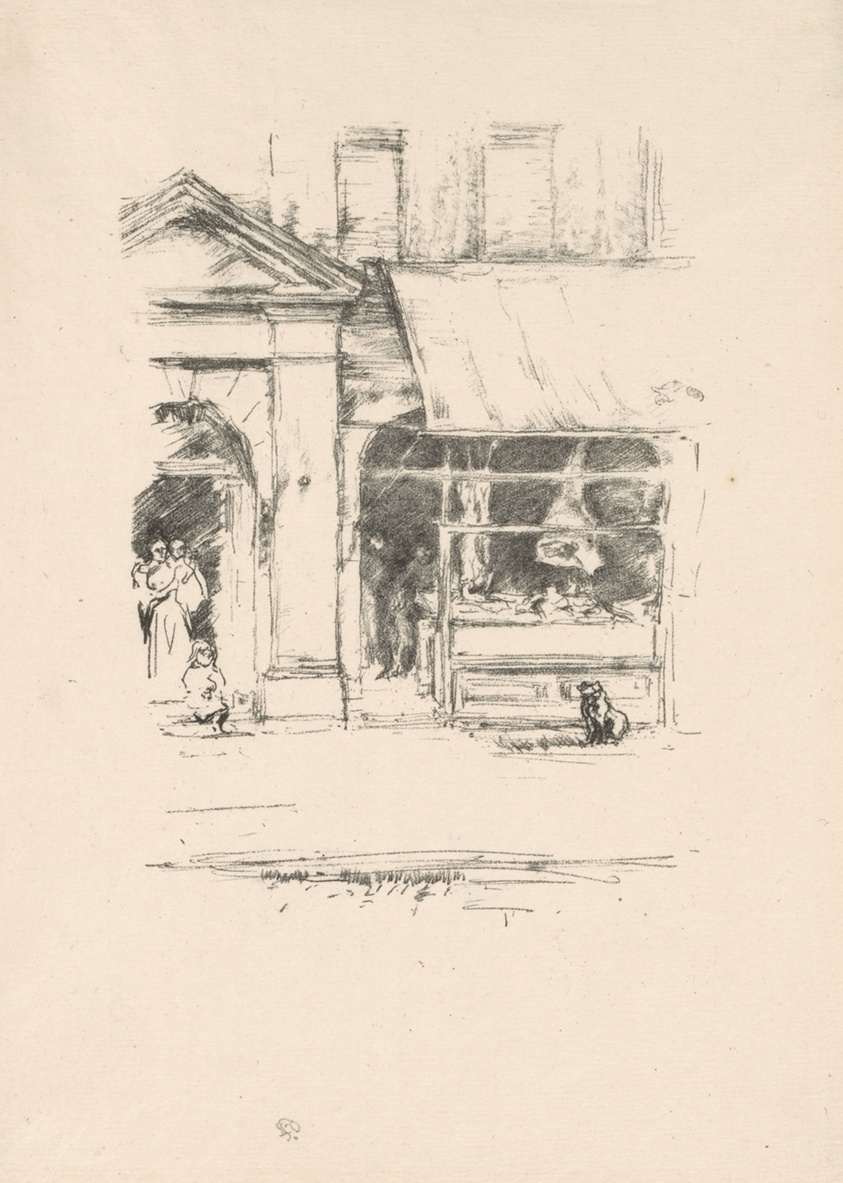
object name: Print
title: The Butcher's Dog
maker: James McNeill Whistler (American, 1834-1903)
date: 1896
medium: Transfer lithograph in black on ivory laid paper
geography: United States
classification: transfer lithograph; lithograph; print; prints and drawing; paper